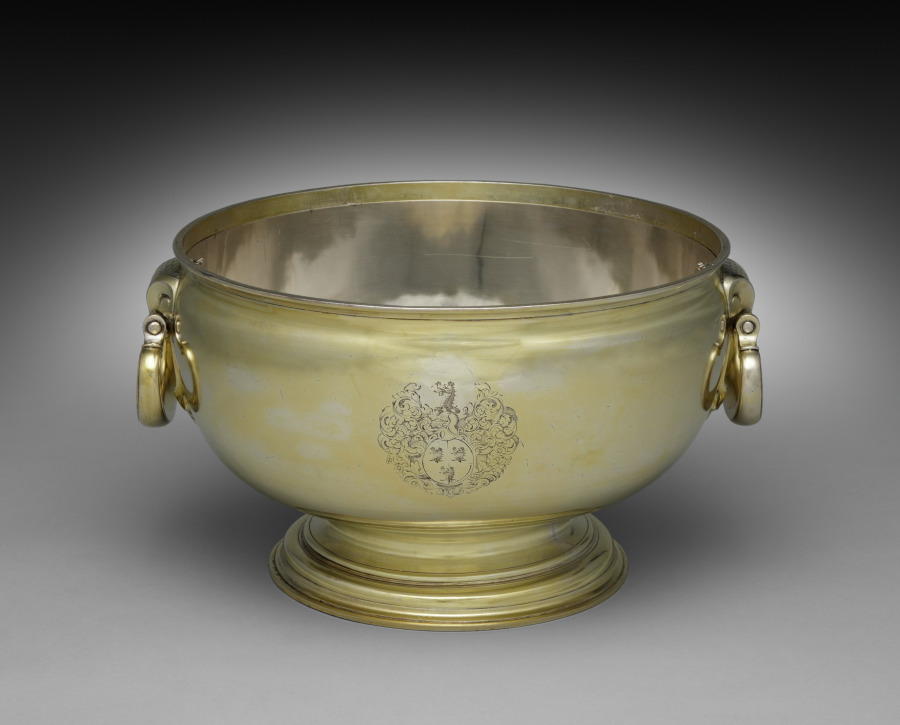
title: Bowl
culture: England, London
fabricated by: Benjamin Pyne (English, active 1693–1727)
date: 1715–16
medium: silver gilt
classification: Silver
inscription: engraved, center of bowl: arms, crest of Byam family (mantling and helmet were probably engraved at time bowl was made, crest and arms were altered to those of Byam at later date). Rim engraved with Byam Crest (also presumably not original).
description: This bowl’s notched rim allows for glasses to be suspended in water for cooling and cleansing between courses during a long dinner. The rim can be removed and the bowl used for punch as well. A year before Benjamin Pyne began this bowl, he was appointed Subordinate Goldsmith to the King in preparation for George I’s coronation (r. 1714–1727). Like much of his work, this Monteith bowl is characterized by its scale and simplicity.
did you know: The name Monteith is said to come from a mythical Scotsman named Monteigh, who wore cloaks with a similar notched pattern.